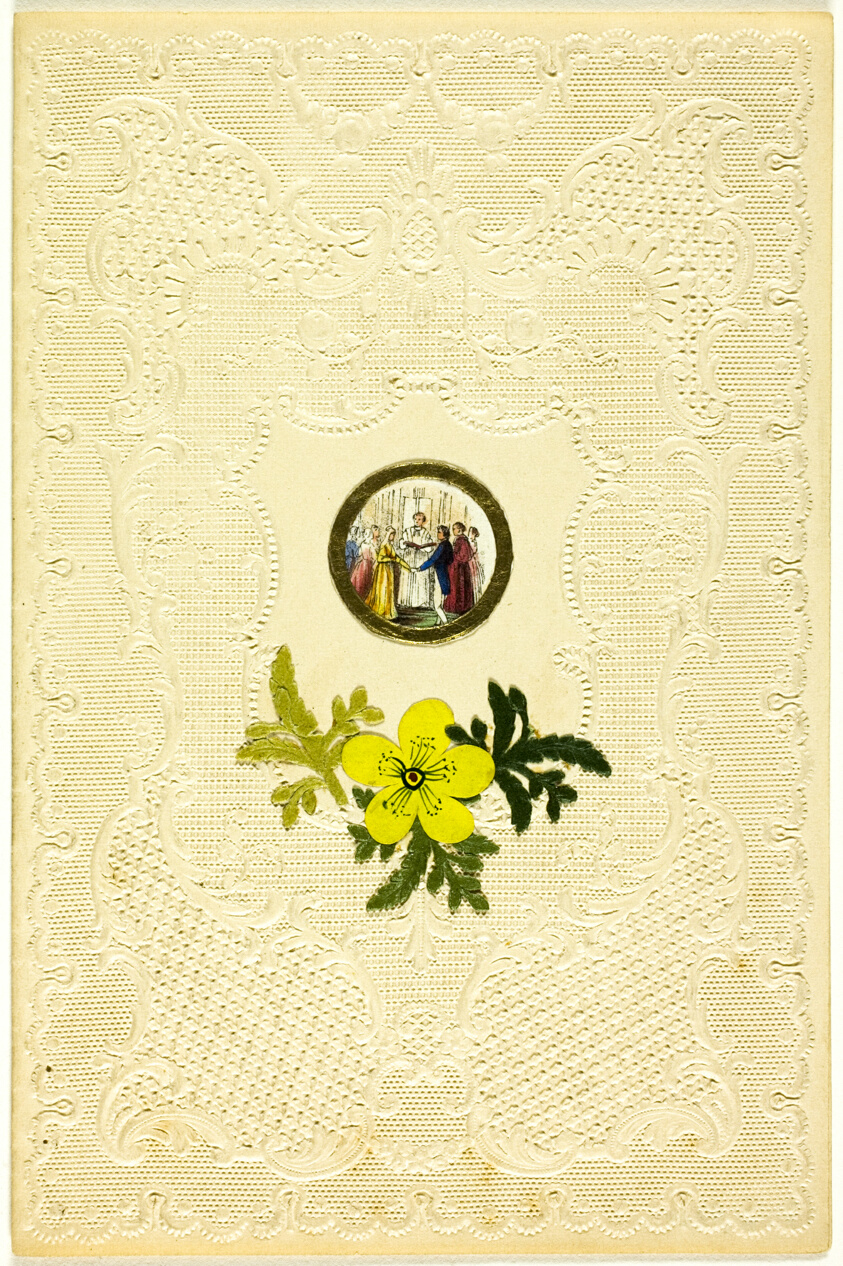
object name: Drawing and Watercolor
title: Untitled Valentine (Wedding Scene)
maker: Unknown Artist; English, 19th century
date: c. 1840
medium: Collaged elements on embossed ivory wove paper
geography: England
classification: valentine; prints and drawing; paper